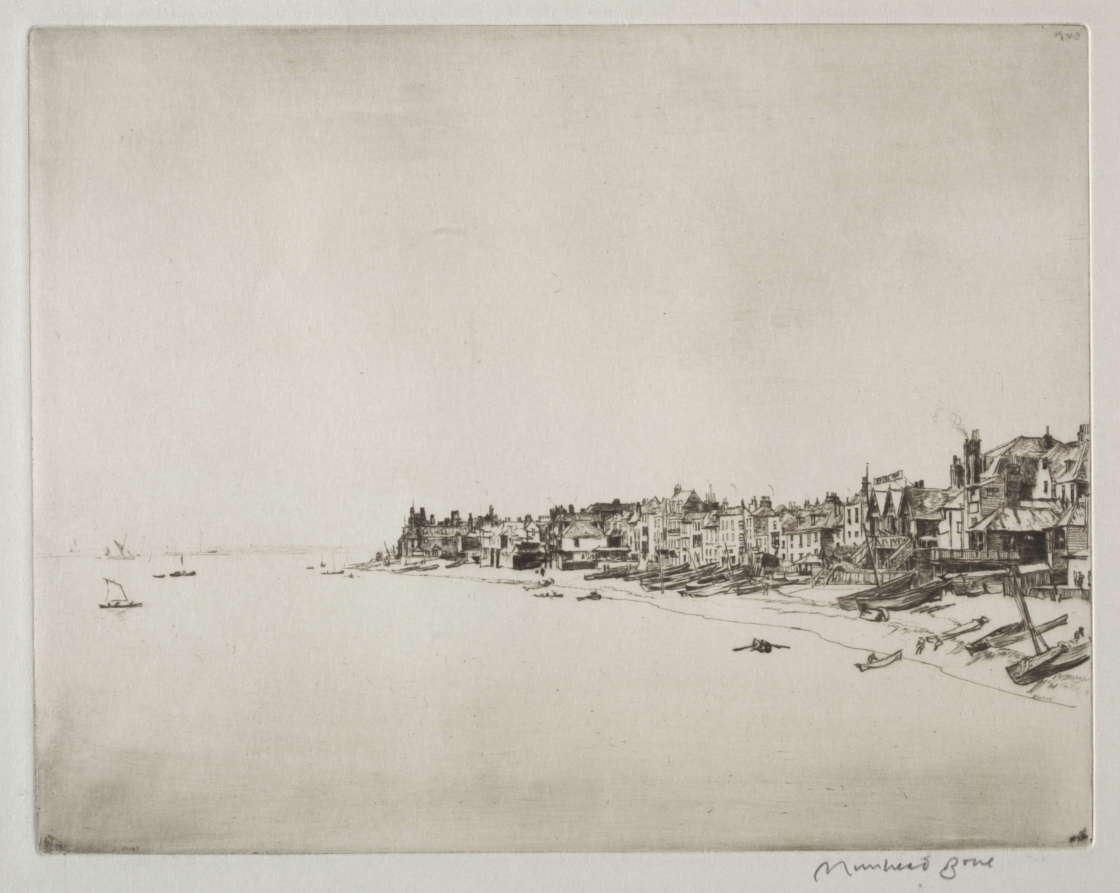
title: Deal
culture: England, 20th century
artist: Muirhead Bone (British, 1876–1953)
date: 1906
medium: drypoint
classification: Print